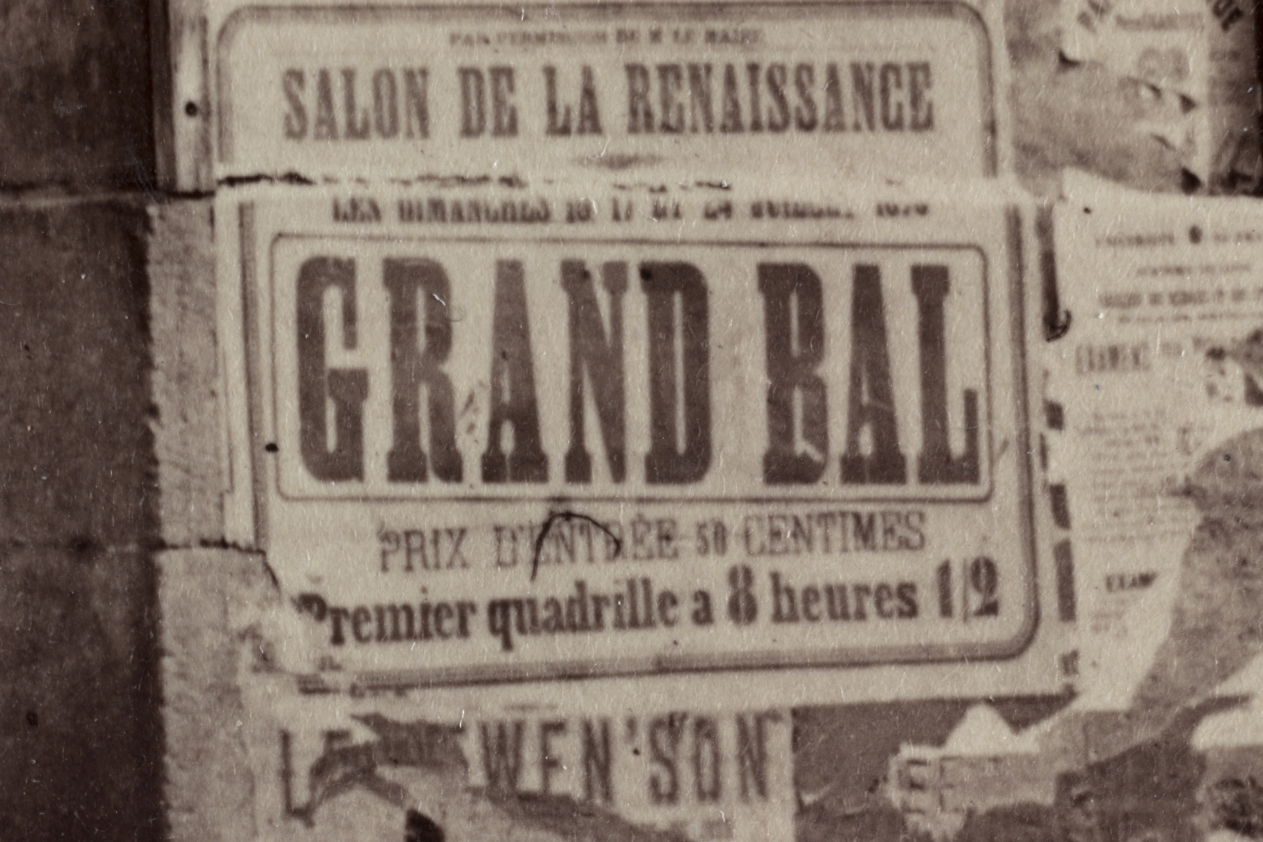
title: Street in Dijon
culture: France, 19th century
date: before 1870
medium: albumen print from wet collodion negative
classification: Photograph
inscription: Written in pencil on verso: "Dijon"